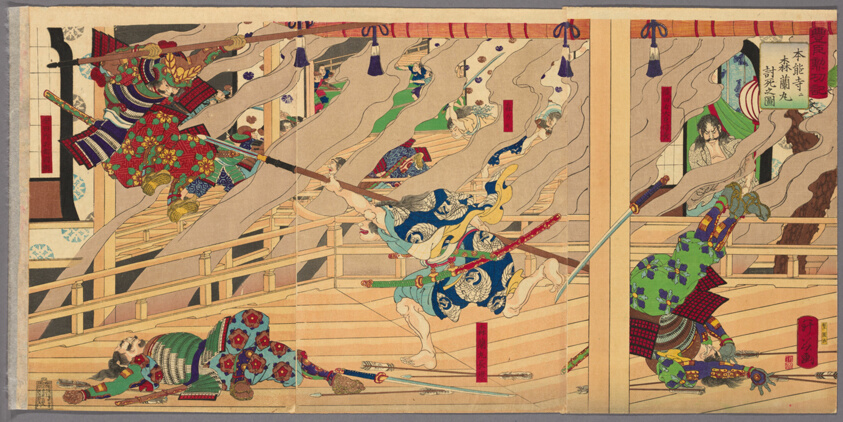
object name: Print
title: Mori Ranmaru Killed in Battle at Honnoji (Honnoji ni Mori Ranmaru uchijini no zu), from the series "The Record of Toyotomi's Achievements (Toyotomi kunkoki)"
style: Japanese (culture or style)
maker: Utagawa Yoshifuji (Japanese, 1828-1887)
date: 1886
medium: Color woodblock print; oban triptych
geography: Japan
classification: woodblock print; print